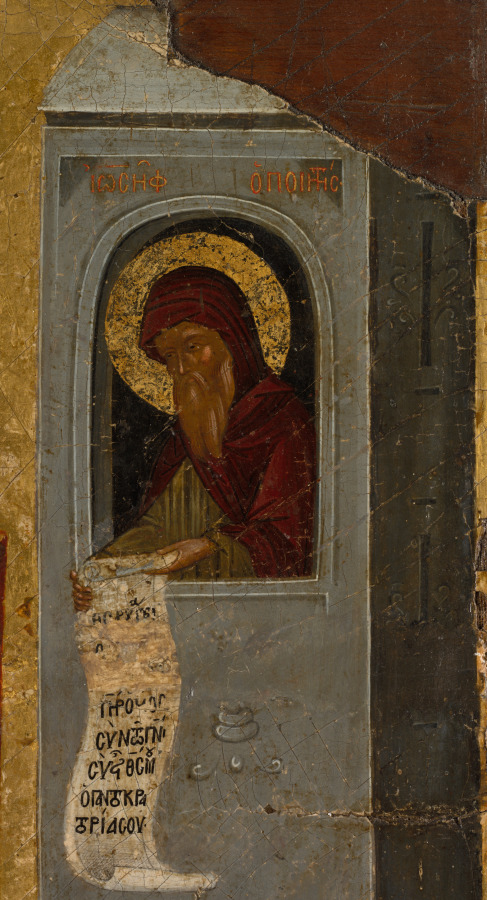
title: Icon of the New Testament Trinity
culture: Byzantium, Constantinople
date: c. 1450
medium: Tempera and gold on wood panel (poplar)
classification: Painting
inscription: Ο ΠΑΛΑΙΟC ΤΗΩ- God the Father as Christ in old age on right identified on either side of his head in gold, outlined in red.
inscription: ΤΟ ΑΙΟΝ ΠΝΑ- The Holy Spirit, identified by dove in gold outlined in red.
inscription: ΙΩCHΦ Ο ΠΟΙΗΤΗC- St. Joseph the Hymnographer identified on the left by gold letters, outlined in red.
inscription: ΚΟCΜ Ο ΠΟΙΗΤΗC- St. Kosmas the Hymnopgrapher identified on the right in gold letters in red outline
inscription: "'together with...you my God' and 'your dominion" in Scroll of Kosmas on the right.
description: This icon depicts an important subject in Orthodox Christian art, the three corresponding figures of the single godhead known as the Holy Trinity. The Trinity is represented here in a composition known as the “New Testament Trinity,” which features Christ and God the Father seated on a bench with a dove representing the Holy Spirit between them. The central field is occupied by a large wooden throne with gold highlights on which Christ (left) and the Ancient of the Days (God the Father as Christ in old age) are seated. The Holy Spirit, in the form of a dove, hovers within an eight-pointed star that signifies the eighth day, the future eon. On either side of the Trinity are two hymnographers, authors of hymns of praise, both identified by gold letters outlined in red—Saint Kosmas (about 675–752) on the left and Saint Joseph (about 812/818–about 886) on the right. They both suspend scrolls from round-arched windows. The icon likely was part of a church templon, the barrier that separated the nave from the sanctuary in an Orthodox church. It is not signed or dated; however, careful analysis of the painting’s style and technique places it in Constantinople around 1450, just prior to the city’s fall to the Ottomans in 1453. It represents a moment when Byzantine painting reached a brilliant crescendo.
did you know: More than just a breakfast food, eggs are used to make the tempera paint used in this painting.